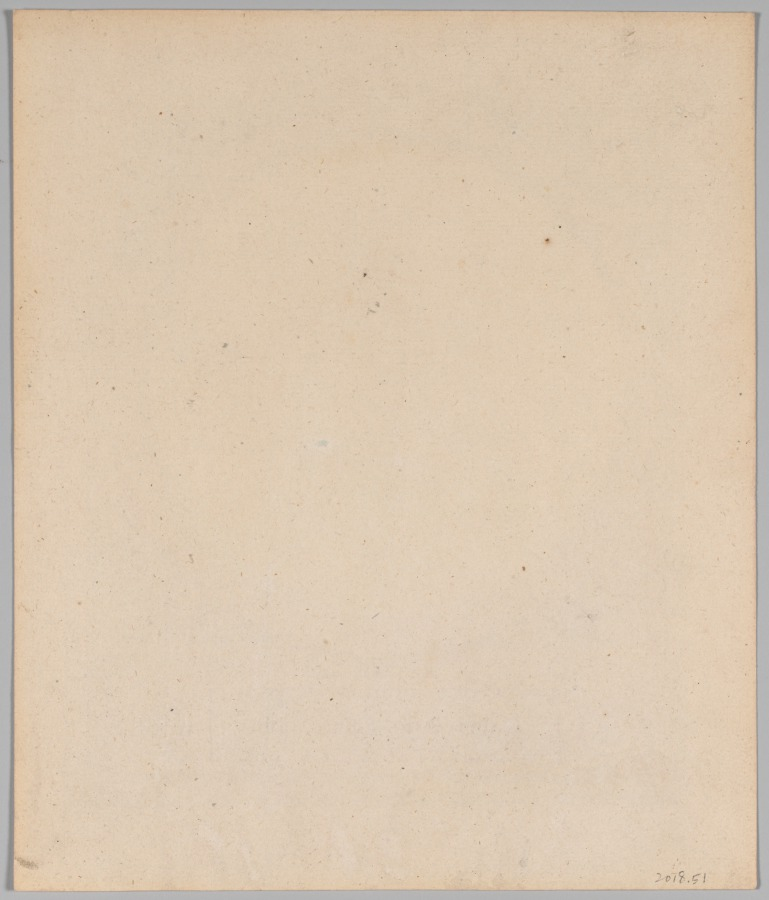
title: Portrait of a Man, said to be the Sculptor Clodion (1738–1814)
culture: France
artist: Unknown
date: late 1700s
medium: Black chalk with stumping and red and blue chalks; frame details in pen and brown ink and blue washes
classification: Drawing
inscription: lower center, in brown ink: Gabriel de Saint-Aubin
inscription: verso of second sheet of laid paper: upper left, in graphite: 2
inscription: Watermark: upper center of second sheet: crowned armorial over D&C Blauw (partial)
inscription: verso of original backing: faded brown label, printed with hand written black ink notations: VENTE 6 MARS 1898 SAINT AUBIN / (GABRIEL DE) / 97.— Portrait presume de Claude-Michel, dit Clo- / dion, célèbre sculpteur né a Nancy / Buste un médaillon, de profile a gauche. Costume / à jabot, perruque nouée derrière par un ruban / Superbe dessin à la pierre noire rehaussé de blanc et / très légèrement relevé d’aquarelle. / Cadre ancien Louis XVI, en bois sculpture et doré / Médallion rond diam 14 / Dacier No 290; yellow label with engraved designs: MARIUS PAULUME / Estamper, Dessins, Miniatures / TABLEAUX / Curiosities & Objets d’Arts / Encadrements / 10. Rue Chauchat. 10 / PARIS / Anciennement 13 Rue Royale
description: This portrait is presumed to represent the French sculptor Clodion (1738-1814). He is depicted as a nobleman, wearing a suit with a ruffled collar and a wig tied with a ribbon. The medallion format and use of color in this drawing recall painted portrait miniatures, an art form that reached the height of its popularity in the 18th century.